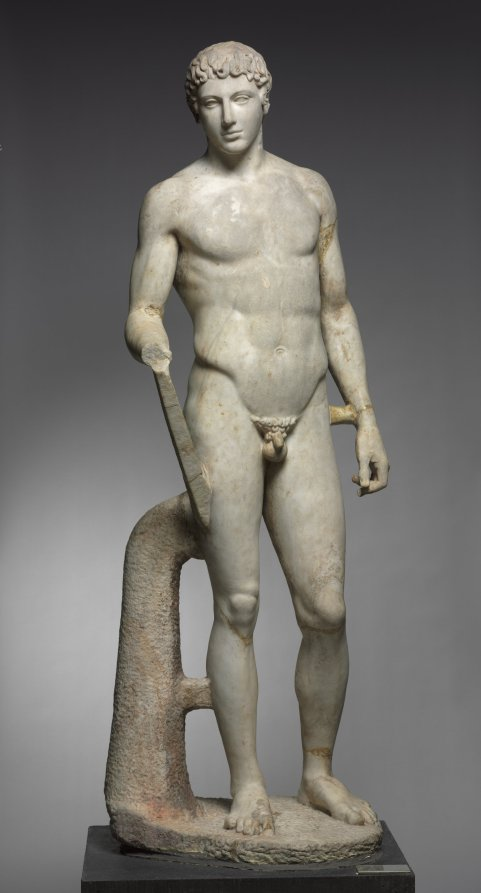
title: Statue of an Athlete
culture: Italy, Roman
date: 1–100 CE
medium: marble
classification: Sculpture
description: This idealized athlete recalls Greek sculptural types invented and popularized during the 400s BC. Large-scale athletes and other sculptures like this were originally created by famous artists as sanctuary dedications. Centuries later, they were widely copied and adapted by Roman sculptors, whose clients sought their own versions of earlier masterpieces. Working in marble rather than bronze, these sculptors added certain elements for stability, such as the struts and the large tree trunk beside the right leg here. Sculptures like this one are profoundly complex, made by and for Romans but descended from Greek ancestors.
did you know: For many years, this sculpture stood in the rotunda of the Cleveland Museum of Art.